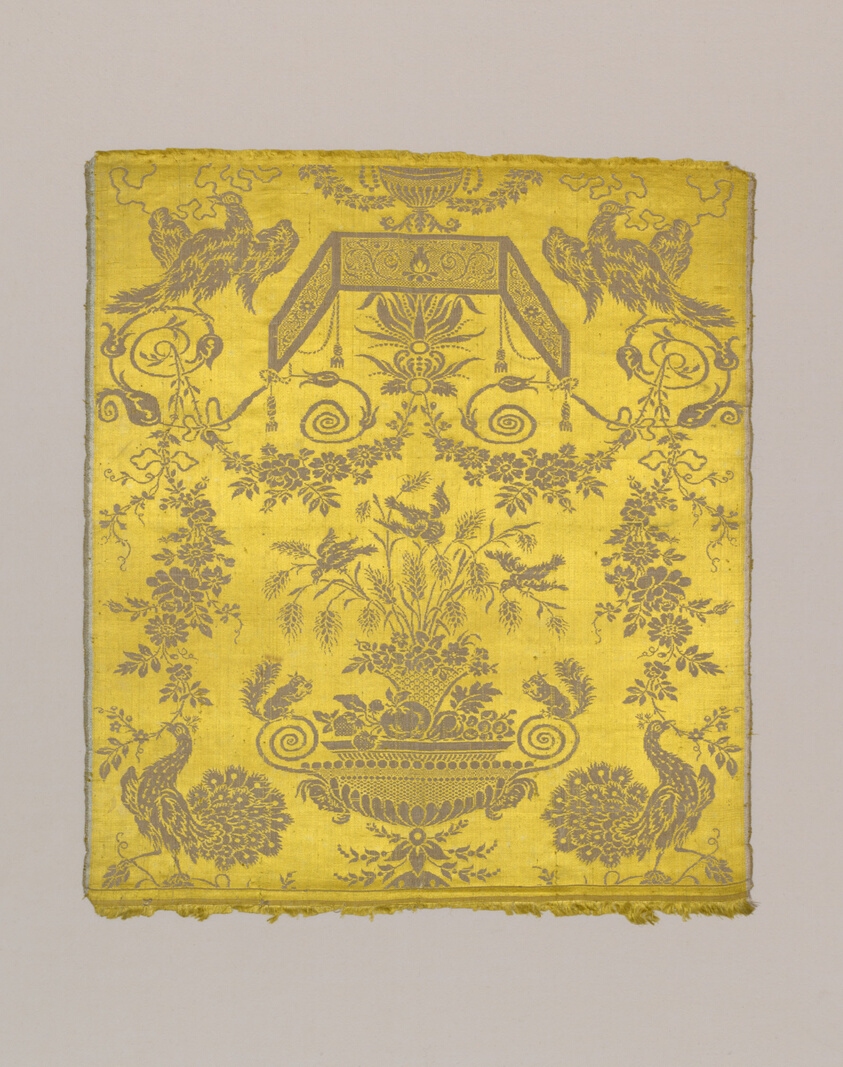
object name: Textile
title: Panel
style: chinoiserie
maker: France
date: Early 19th century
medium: Silk, warp-float faced 7:1 satin weave with plain interlacings of secondary binding warps and self-patterning ground wefts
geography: France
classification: textile; weaving